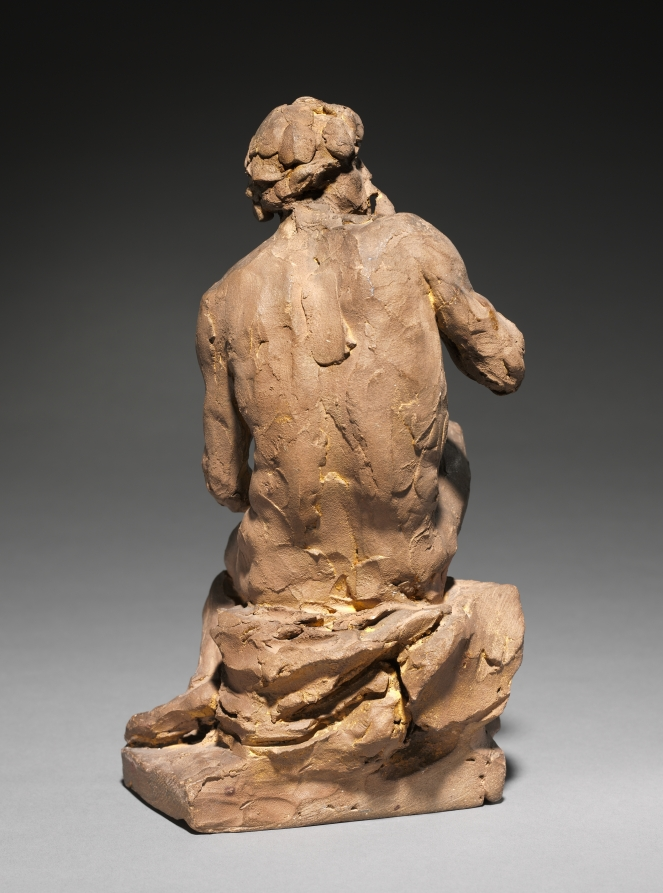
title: Study for "Silence"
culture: France, 18th century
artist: attributed to Louis-Philippe Mouchy (French, 1734–1801)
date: c. 1780–89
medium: terracotta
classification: Sculpture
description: When originally acquired this work was understood as a sketch for the "Citizen," a figure for a monument to King Louis XV in the French city of Rheims by Jean-Baptiste Pigalle. In that work the figure of the "Citizen" appears at the base, opposite an allegory of law, underneath a sculpture of Louis XV. The attribution was changed, however, after research made evident that the museum's sculpture precisely matches the iconography for "Silence." Moreover, the figure differs considerably from Pigalle's final figure of the "Citizen," throwing the attribution to Pigalle in question as well. The work is now believed to be by Pigalle's close follower, Mouchy, because of its similarity to a sculpture completed in 1789 for Madame Pompadour called Silence, which currently resides in the Luxembourg Palace in Paris.